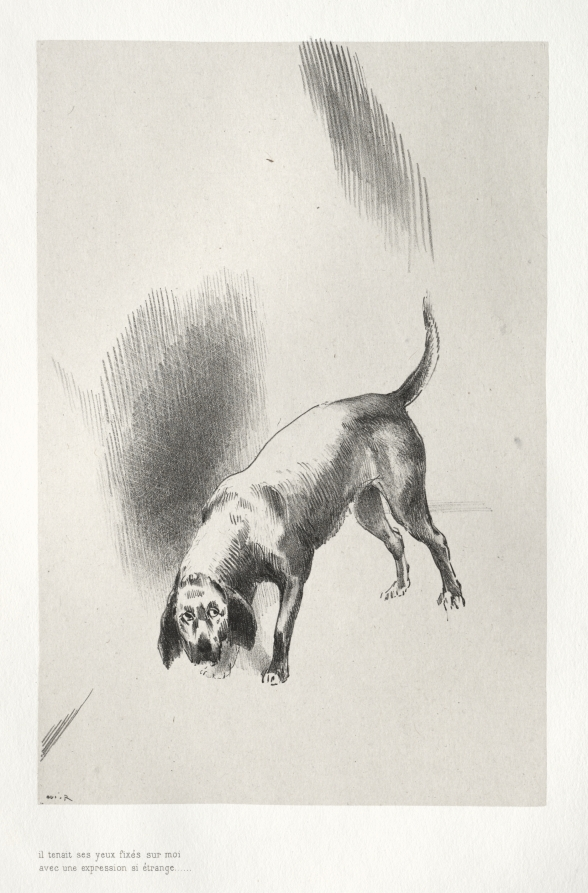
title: He Fixed His Eyes on Me with an Expression That Was So Strange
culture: France, late 19th Century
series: The Haunted House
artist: Odilon Redon (French, 1840–1916)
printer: Auguste Clot (French, 1858–1936)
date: 1896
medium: lithograph on China paper laid on wove paper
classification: Print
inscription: printed at lower left, below image: il tenait ses yeux fixés sur moi / avec une expression si étrange.....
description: Odilon Redon was a voracious reader of contemporary literature, and such texts often influenced his art. This series was inspired by The Haunted and the Haunters, an 1859 novel by British writer Edward Bulwer-Lytton. Redon’s prints capture the book’s mysterious tone and emphasis on the supernatural through vague but evocative imagery that sometimes borders on abstraction. By this time a seasoned expert in lithography, the artist collaborated with master printer Auguste Clot. Their combined technical skills allowed for the rich tonal variation seen here, made by turning Redon’s lithographic crayon on its side, layering various marks, and even scratching directly into the surface of his stone.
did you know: One of Redon's greatest patrons, the occultist René Philipon, commissioned this portfolio as a supplement for his French translation of Bulwer-Lytton's The Haunted and the Haunters.